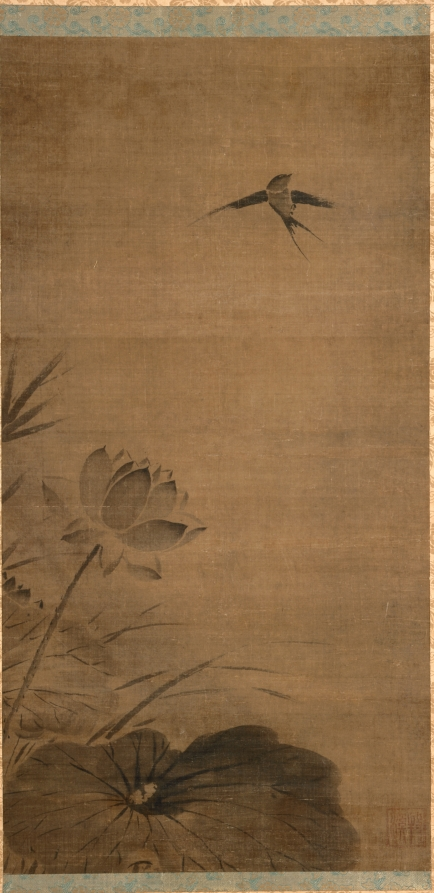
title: Swallow and Lotus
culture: China, Southern Song dynasty (1127–1279)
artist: attributed to Fachang Muqi (Chinese, 1220–1280)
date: mid-1200s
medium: Hanging scroll; ink on silk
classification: Painting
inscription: Seal of Mu Qi in lower right corner.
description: A swallow with wings spread in flight soars above a lush lotus blossom, which rises above two broad leaves and grassy shoots.